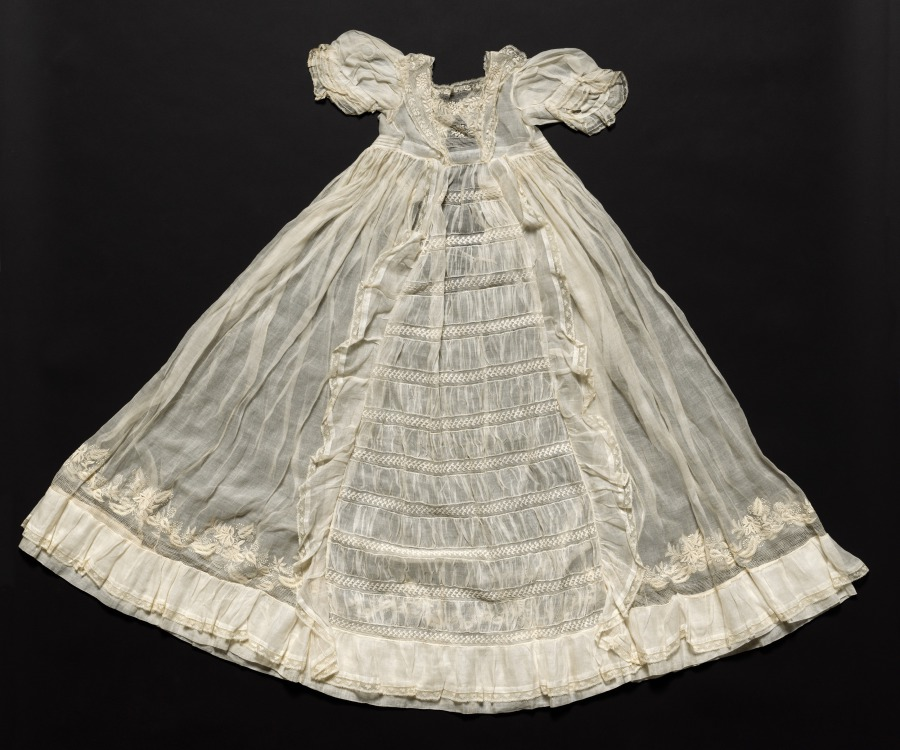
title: Baby's Dress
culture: France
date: 1800s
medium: Plain weave cotton: needle lace (drawnwork) and embroidery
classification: Garment